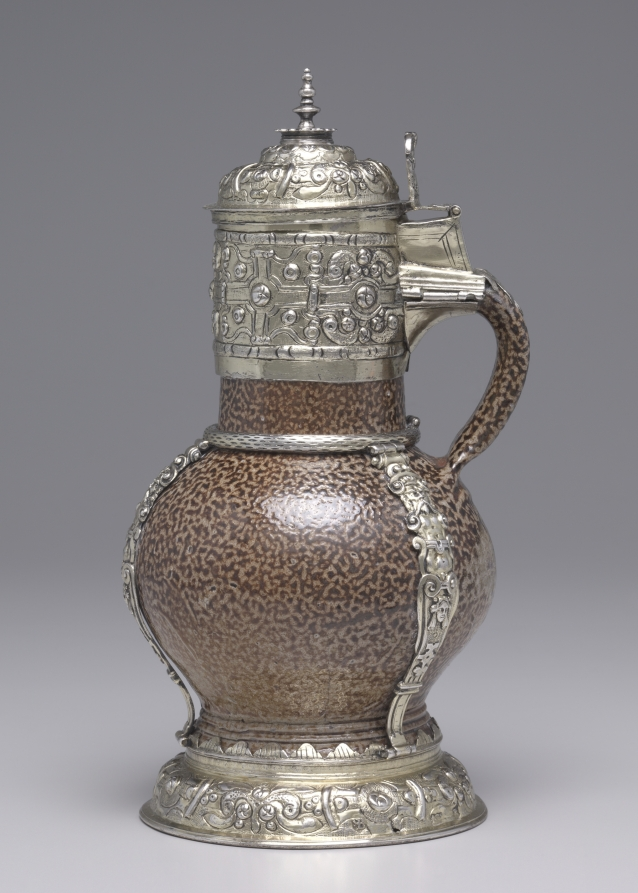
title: Tigerware Jug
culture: Germany and England, 16th century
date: 1594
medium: stoneware with gilt-silver mounts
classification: Metalwork